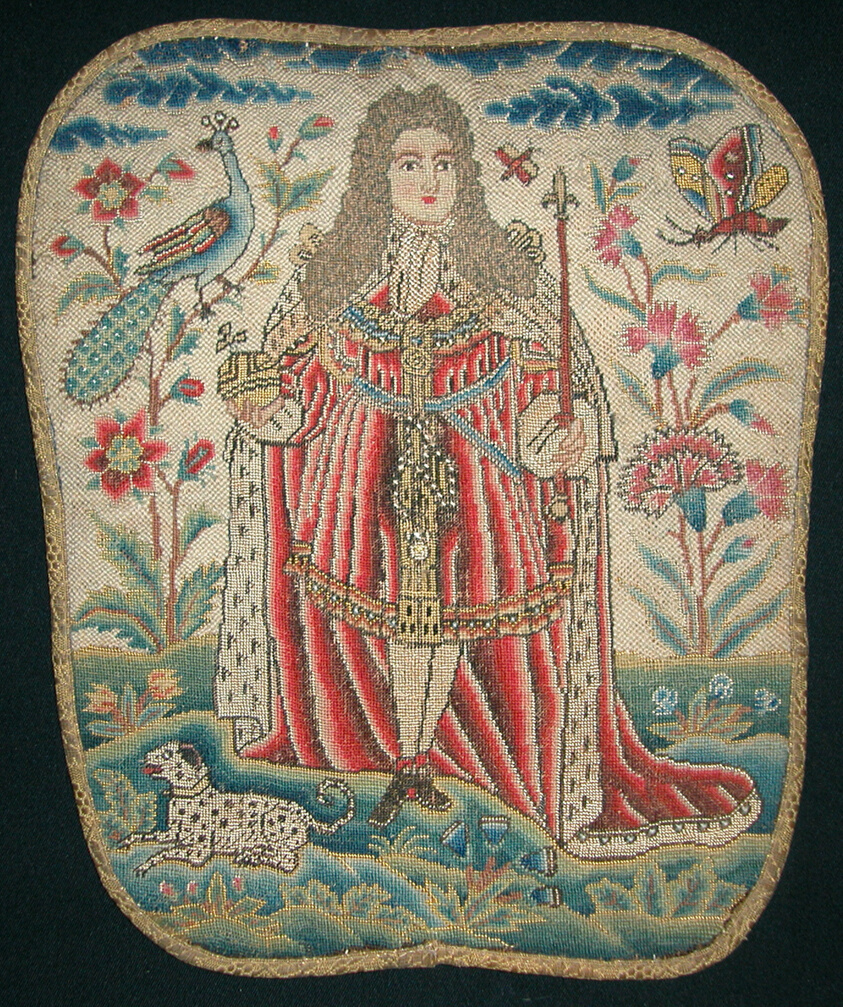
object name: Costume and Accessories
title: Fire Fan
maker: England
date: 1701/25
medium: Linen, plain weave; embroidered with silk and wool in cross, upright Gobelins, and tent stitches; edged with silk, cotton and gilt-metal-strip wrapped cotton, plain weave with patterning wefts; backed with linen, plain weave; glazed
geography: England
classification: textile; needlework (visual works); costume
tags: peacocks, animals, dogs